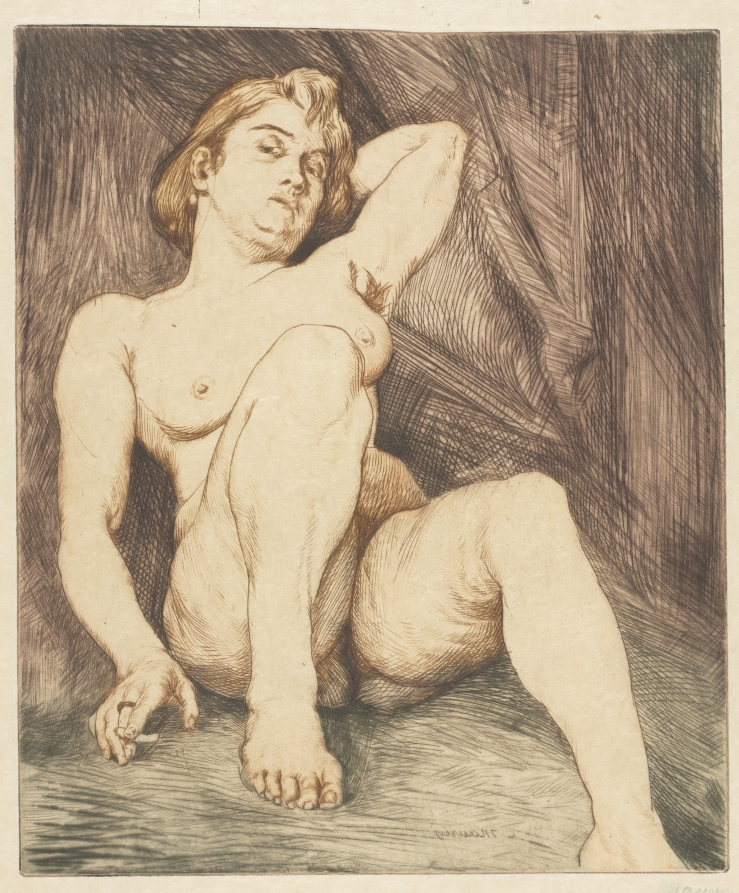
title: The Cigarette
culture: France, 19th century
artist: Charles Maurin (French, 1856–1914)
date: c. 1880–1914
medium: drypoint, engraving and lavis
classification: Print